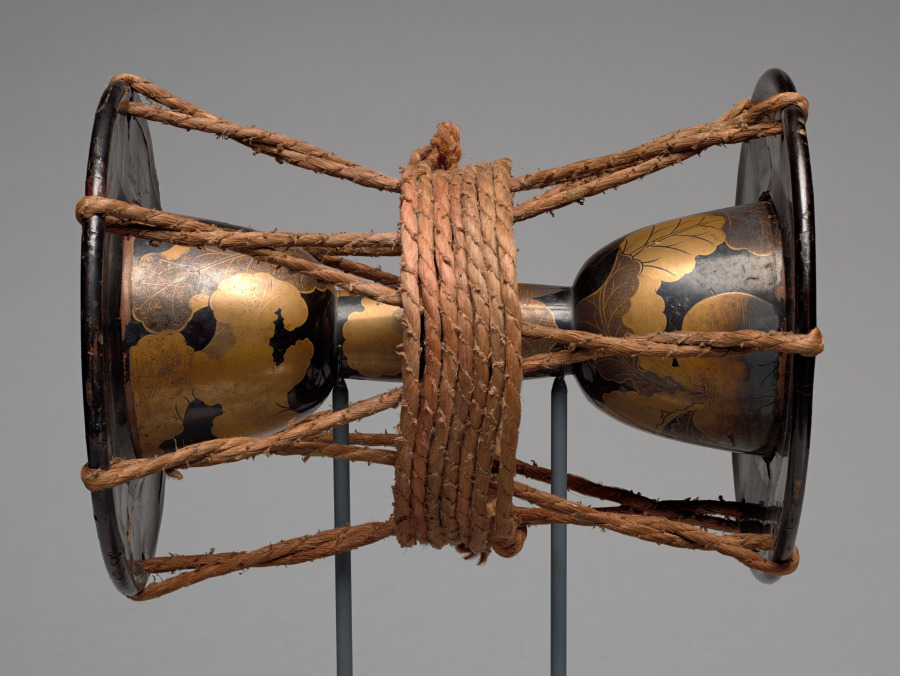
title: Tsuzumi Drum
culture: Japan, Edo period (1615–1868) to Meiji period (1868–1912)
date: 1800s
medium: Wood with lacquer and sprinkled gold powder (maki-e), hide, iron, and cord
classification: Musical Instrument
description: Tsuzumi hand drums were used as musical accompaniment for formal theatrical productions such as Noh, but also in traditional folk music. Small tsuzumi like this one are set against one shoulder, and held in place with one hand, while the other hand beats the heads. The sound is adjusted by regulating the humidity of the hide with one’s breath or spittle.